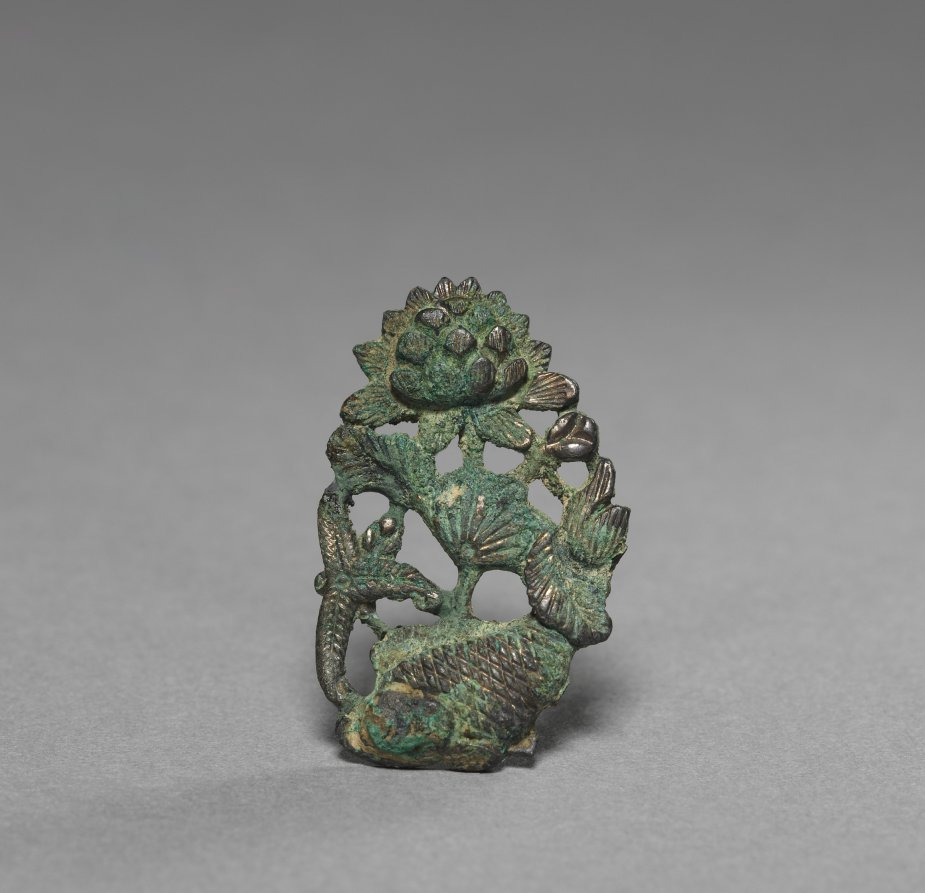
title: Ornament with Carp and Lotus Design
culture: Korea, Goryeo dynasty (918–1392)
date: 1100s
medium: gilt bronze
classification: Metalwork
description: Metalworking techniques advanced remarkably during the Goryeo period (918–1392). Sophisticated metal objects with intricate designs were used not only as daily accessories, but also as burial goods for commemorating the dead. Traces of fibers found on the backs of these metal ornaments suggest that they were once used as brooches to hold garments together.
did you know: This metal ornament is part of a decorative brooch once used to hold clothes together.